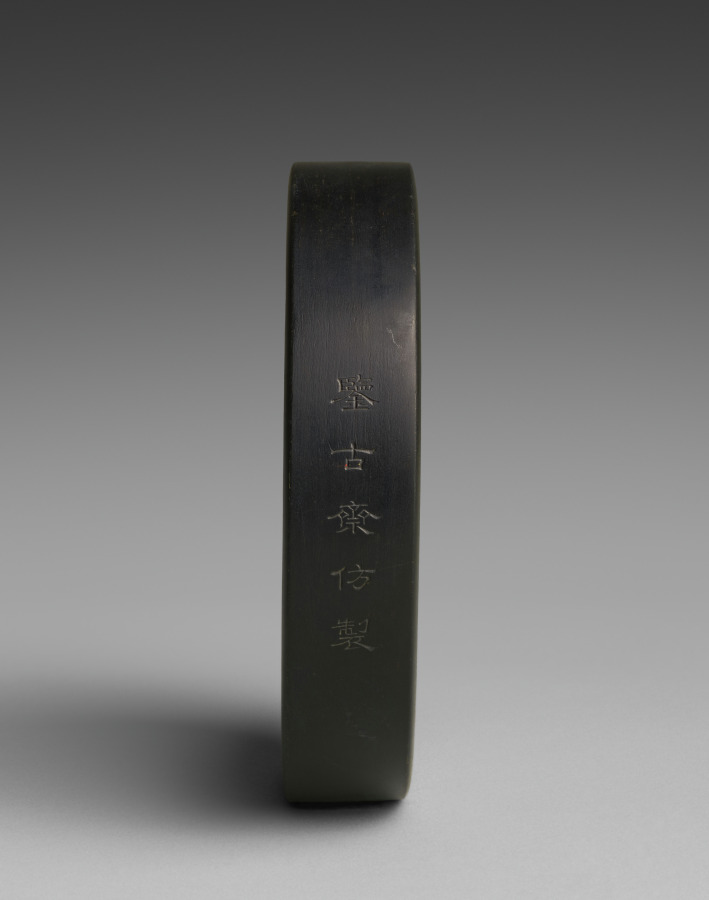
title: Inkstone in the Shape of a Roof Tile with Seal Script Characters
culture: China, Qing dynasty (1644–1911)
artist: Workshop of Jian Guzhai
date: 1700s–1800s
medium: She stone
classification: Stone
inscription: 七葉永祥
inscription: 「鑑古齋仿製」 「穎川春暉館文寶」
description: This inkstone is particularly noteworthy for its inscriptions in two styles. The base shows four characters in seal script (zhuanshu) expressing auspicious, or favorable wishes, while the characters on the side in standard script (kaishu) record the name of the workshop and that of the collector’s studio. Inkstones were used to grind solid ink cakes with the addition of water to produce liquid ink for brush painting and calligraphy.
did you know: The four large seal script characters on the base of this inkstone, 七葉永祥, may be read as "eternal good fortune for seven generations."